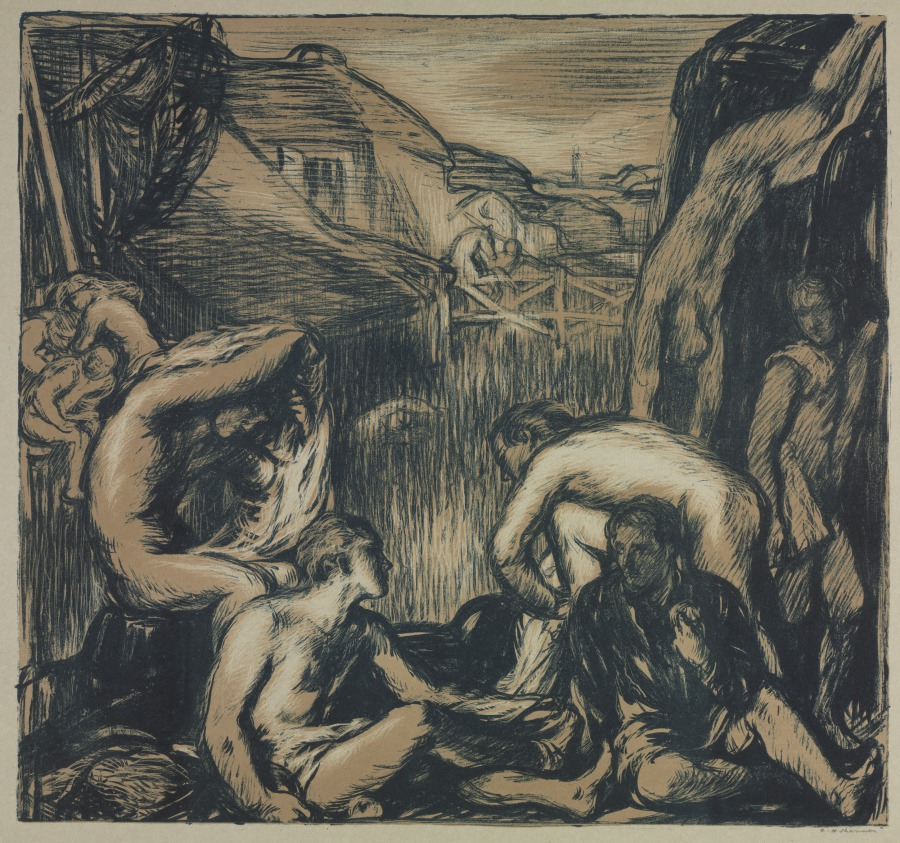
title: Bathers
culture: England, early 20th century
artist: Charles Hasslewood Shannon (British, 1863–1937)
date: 1904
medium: lithograph in blue-green and beige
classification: Print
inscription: Lower right, in pencil: "C.H. Shannon" bottom left, in pencil: "OroCo."